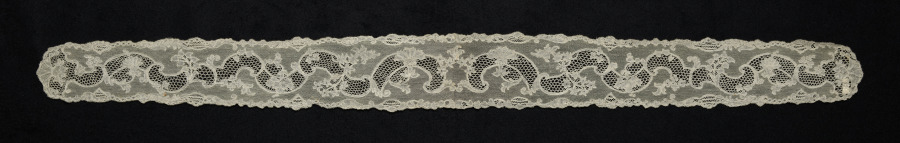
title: Lace Lappet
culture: Belgium, Mechelen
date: 1715–74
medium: Linen: bobbin lace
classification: Lace